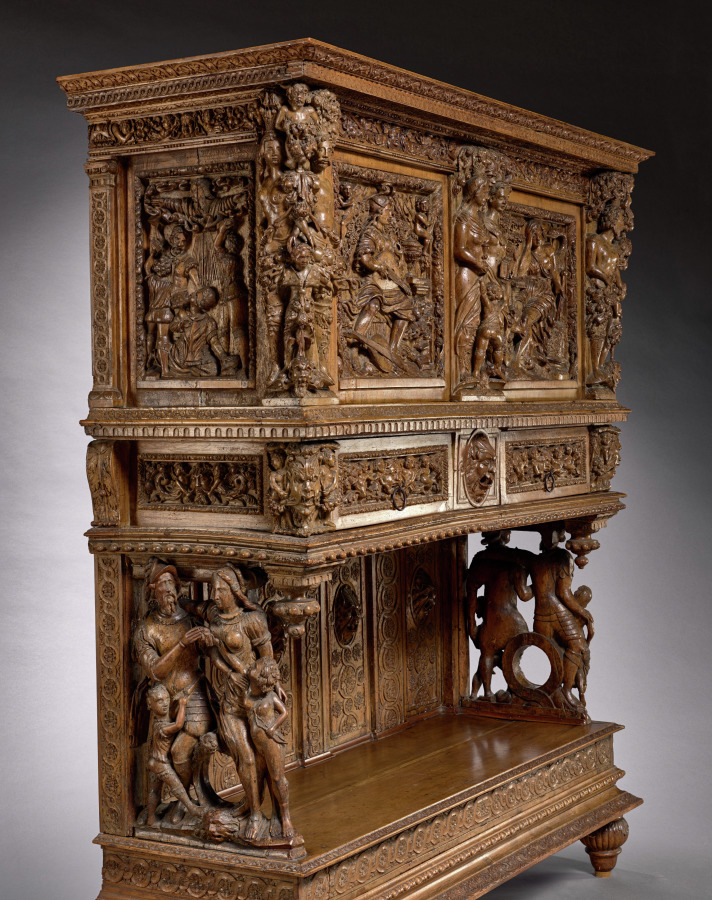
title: Dressoir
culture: France, Burgundy, 16th century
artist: style of Hugues Sambin (French, 1518–c. 1601)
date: mid 1500s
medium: walnut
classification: Furniture and woodwork